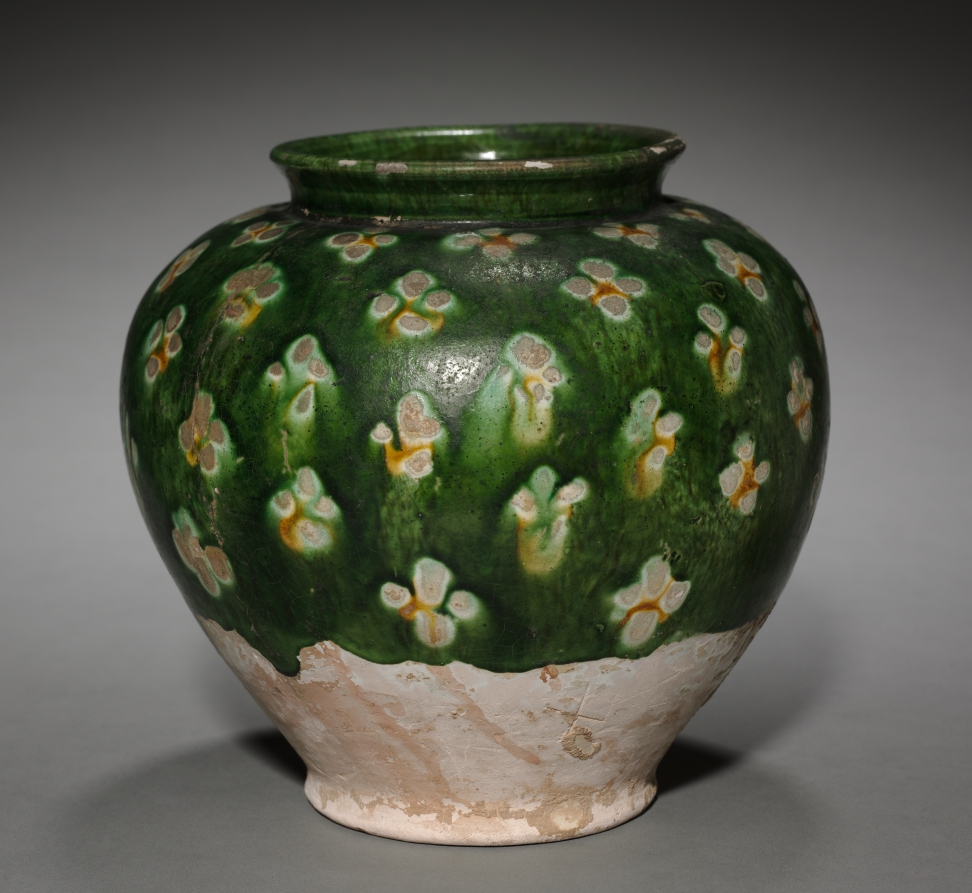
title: Jar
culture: China, Tang dynasty (618-907)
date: late 600s–700s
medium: glazed pinkish-buff earthenware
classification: Ceramic